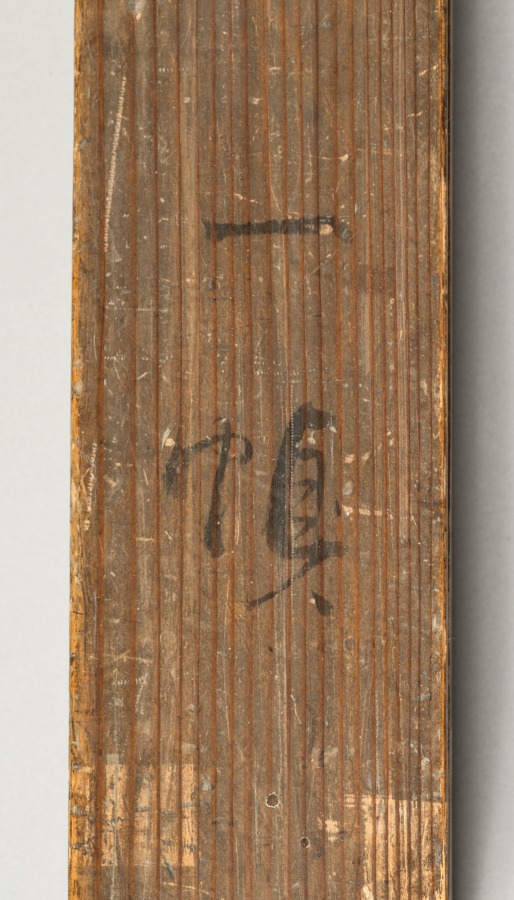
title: Monkeys by a Stream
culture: Japan, Edo period (1615–1868)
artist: Nagasawa Rosetsu (Japanese, 1754–1799)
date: c. 1796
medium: hanging scroll; ink and color on paper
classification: Painting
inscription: Inscription: 平安蘆雪寫意; Transliteration: Heian Rosetsu shai; Sealed: 魚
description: The two monkeys in this painting are Japanese macaques. The one in front dangles its left leg over a sharply angled rock, surveying the land beyond a fast-moving mountain stream. A smaller monkey sits behind it, looking directly ahead as if it realizes it is being watched. The artist used just a few highly contrasting warm and cool colors, sweeping brushstrokes over ink washes, and loose lines to create a scene that powerfully evokes the mentally engaged state of the two animals.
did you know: Monkeys, which are found throughout the mountainous and wooded areas of Japan, became a favorite subject of many later Japanese artists.